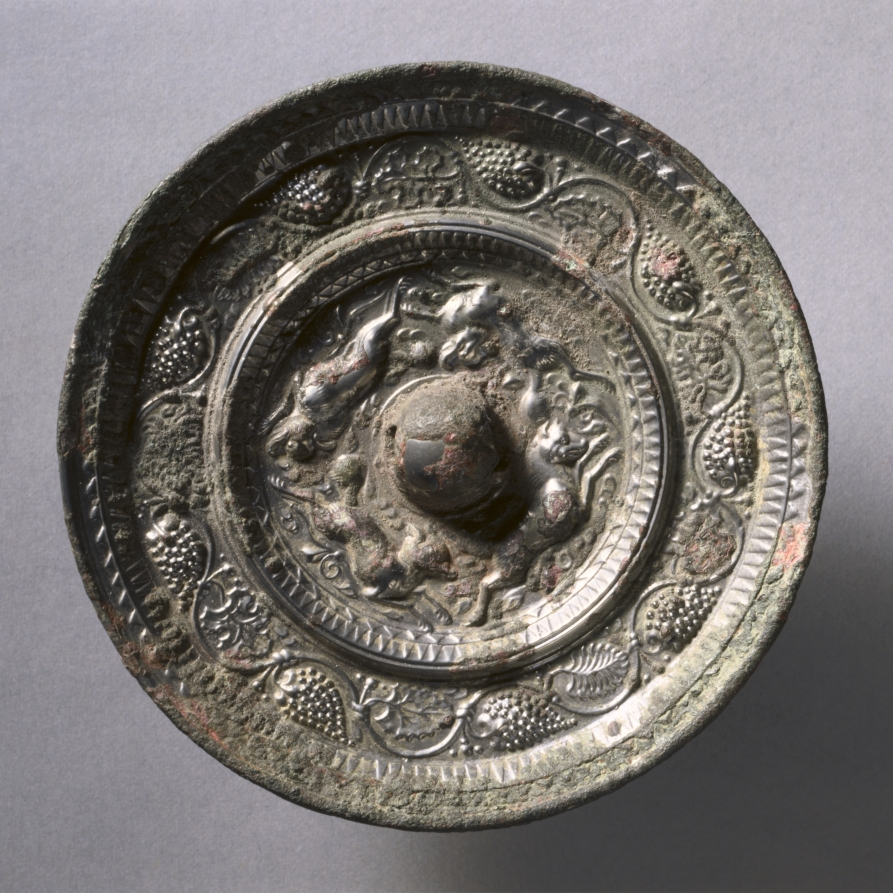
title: Animal-and-Grape Mirror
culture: China, Tang dynasty (618-907)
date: early to mid 600s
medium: bronze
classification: Metalwork